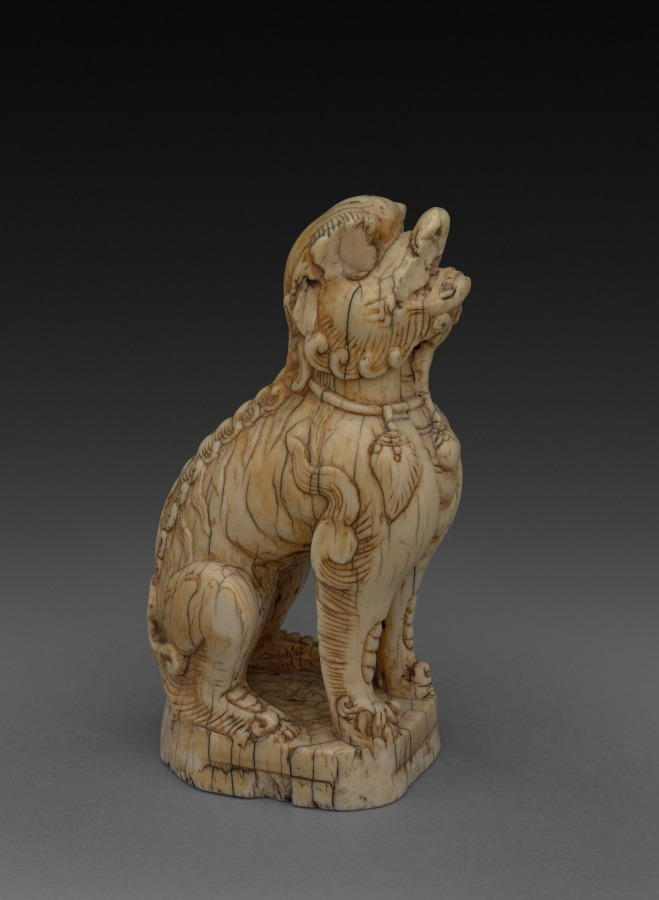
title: Lion Dog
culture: China, Song dynasty (960-1279) - Yuan dynasty (1271-1368)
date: 13th - 14th century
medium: ivory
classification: Ivory